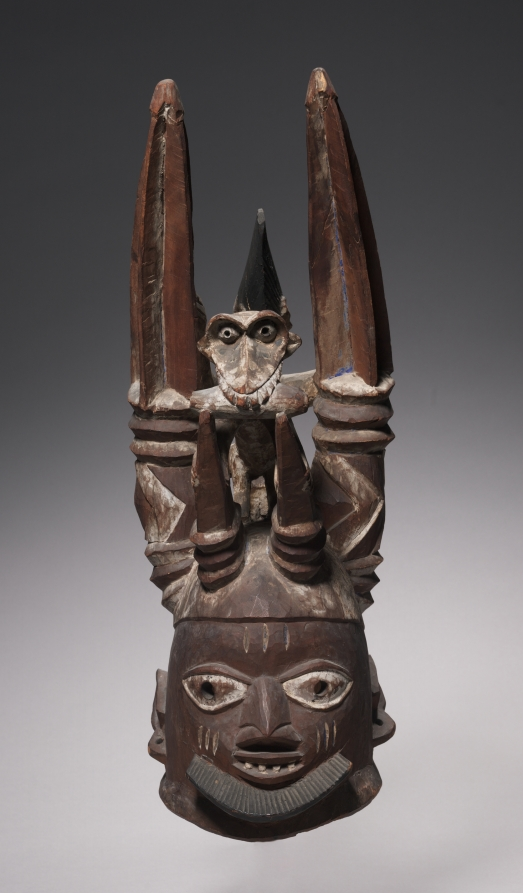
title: Helmet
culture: Africa, West Africa, Nigeria, Yorùbá-style maker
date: late 1800s–early 1900s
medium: Wood and paint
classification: Mask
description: This type of helmet used by the Oro association, is often mistaken for the more common Egungun. While Egungun masquerades are performed to honor an individual's ancestors, Oro masquerades are performed in conjunction with the actual funeral of a Yoruba person. The Oro association is very secretive, and the visibility of helmets like this one is generally restricted. Oro is also responsible for carrying out criminal sentences, such as collecting fines, repossessing goods, and executing those convicted of a capital crime. The female figure suspended from the back of the horns may reference the victims of Oro executions. This work has been attributed to the Esubiyi School of Abeokuta, founded about 1860.